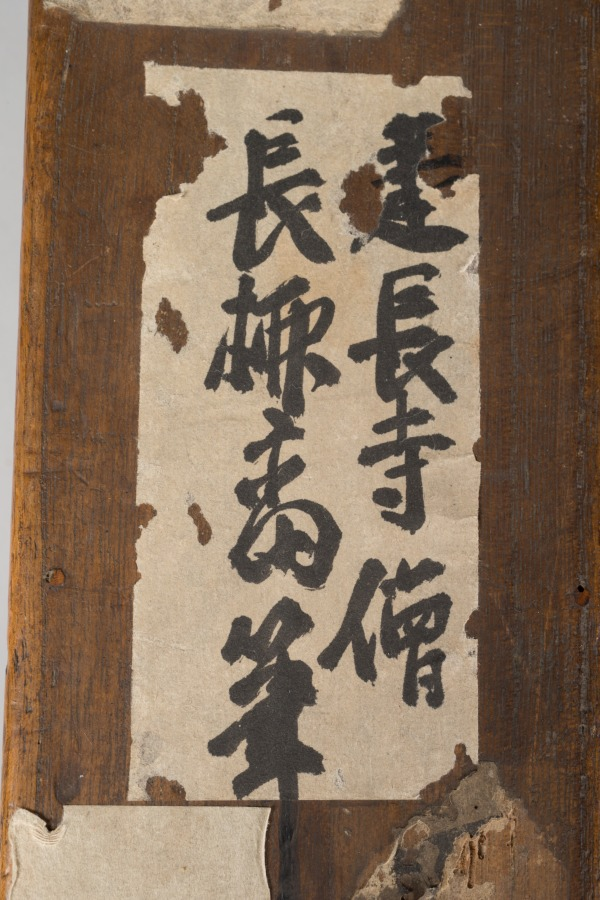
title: Emperor Minghuang Teaching Yang Gueifei to Play the Flute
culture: Japan, Muromachi period (1392–1573)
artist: Choryusai (Japanese)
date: late 1400s–early 1500s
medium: hanging scroll; ink and color on paper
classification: Painting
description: Minghuang, a prominent emperor of Tang (618-906) China and his consort, Yang Gueifei, have inspired many legends, paintings, and poetry in later Chinese culture. Through the study of Chinese literature and the collecting of Chinese paintings, tales of their lives and romance became well-known in Muromachi Japan.